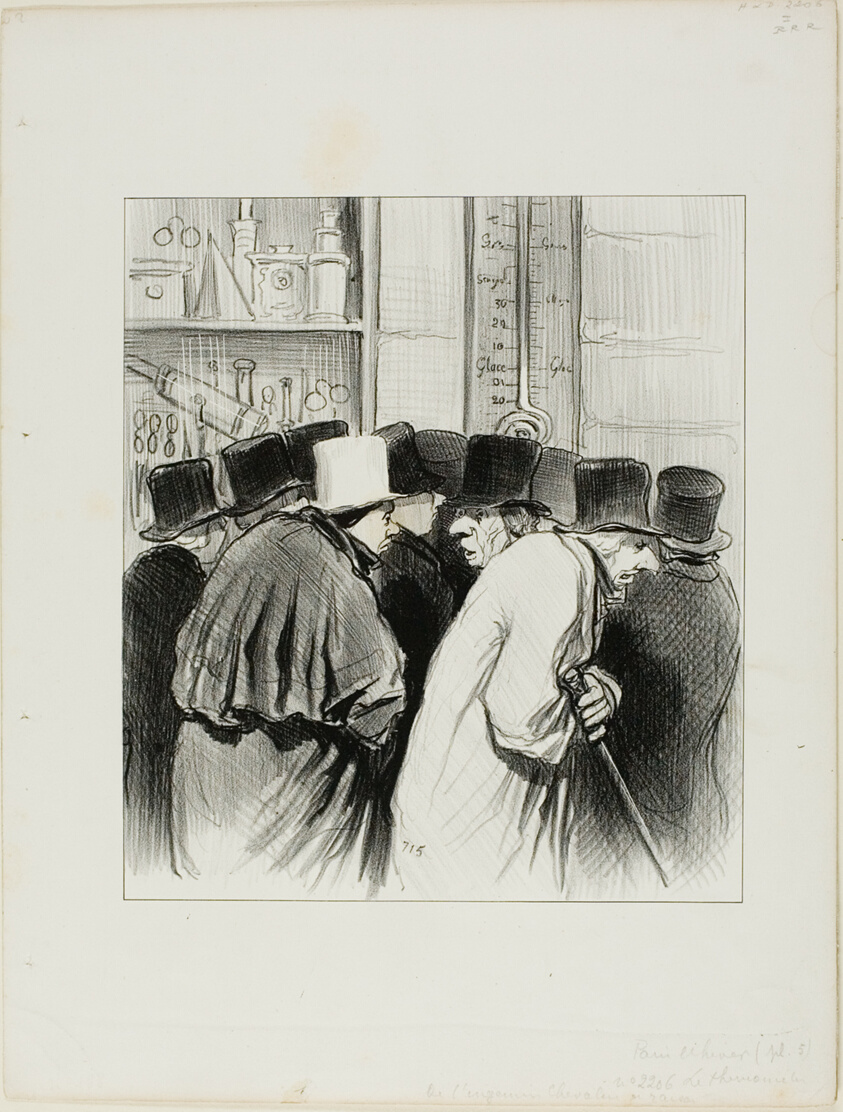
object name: Print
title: "The thermometer of the engineer Chevalier was right... at 10 degrees the large rivers as well as the noses have cought a cold... just imagine that it might take three weeks for my nose to thaw!...," plate 5 from Paris L'hiver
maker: Honoré Victorin Daumier (French, 1808-1879); printed by Aubert & Cie. (French, active 19th century); later published in Le Charivari (French,1832-1915)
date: 1845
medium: Lithograph in black on white wove paper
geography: France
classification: lithograph; print; prints and drawing